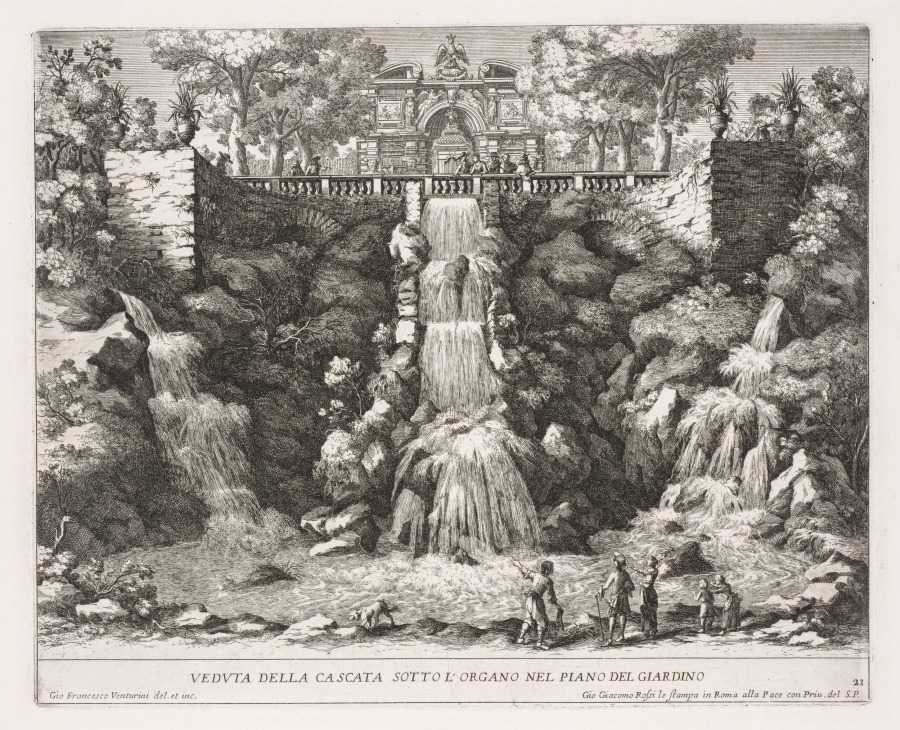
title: The Fountains of Rome (Le fontane di Roma), Book IV, plate 21: View of the Cascade below the Organ from the Garden (Veduta della Cascata Sotto L'Organo nel Piano del Giardino)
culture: Italy, 17th century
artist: Giovanni Francesco Venturini (Italian, 1650–1710)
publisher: Stamperia Giovanni Giacomo de Rossi (Italian, 1600–1750)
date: 1676–1700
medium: etching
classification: Print